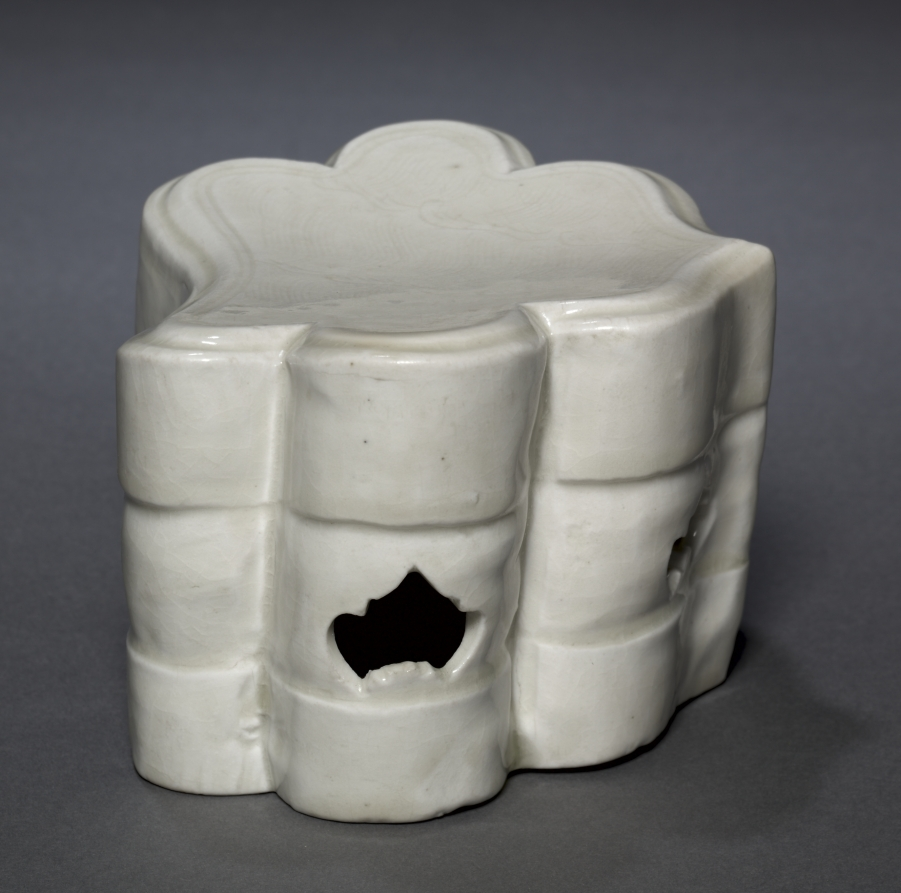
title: Cloud-Collar Pillow with Waves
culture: China, Jiangxi Province, Northern Song dynasty (960–1127)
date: 1000s–1100s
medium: glazed porcelain with incised and carved decoration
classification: Ceramic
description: This ceramic pillow in the form of a cloud—a design pattern variously referred to as ruyi, the shape of a head of an auspicious scepter—is a fine example of qingbai ware from Jiangxi province. It has a pure white body covered with a transparent, glassy glaze that carries a faint greenish tinge, thus giving it another name, yingqing, or "shadow blue." On the surface of the pillow is a carved and incised design of repeating wave patterns. The beauty of this piece lies in its elegance of form, simplicity of design, and delicacy of workmanship.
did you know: While ceramic might not be your choice for a pillow, it actually kept the user cool as they slept.